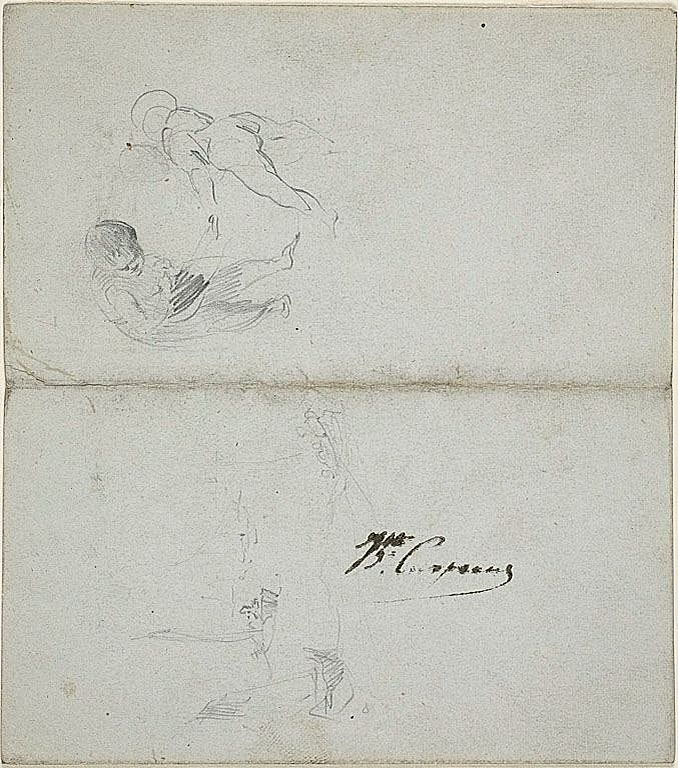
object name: Drawing and Watercolor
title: Sketches of Two Children, Boats at Sea (recto); Sketches of Striding Male Figure Holding Staff and Coastal Scene (verso)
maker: Jean Baptiste Carpeaux (French, 1827-1875)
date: 1847/75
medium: Graphite (recto and verso) on bluish gray wove paper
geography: France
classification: graphite; drawings (visual works); prints and drawing